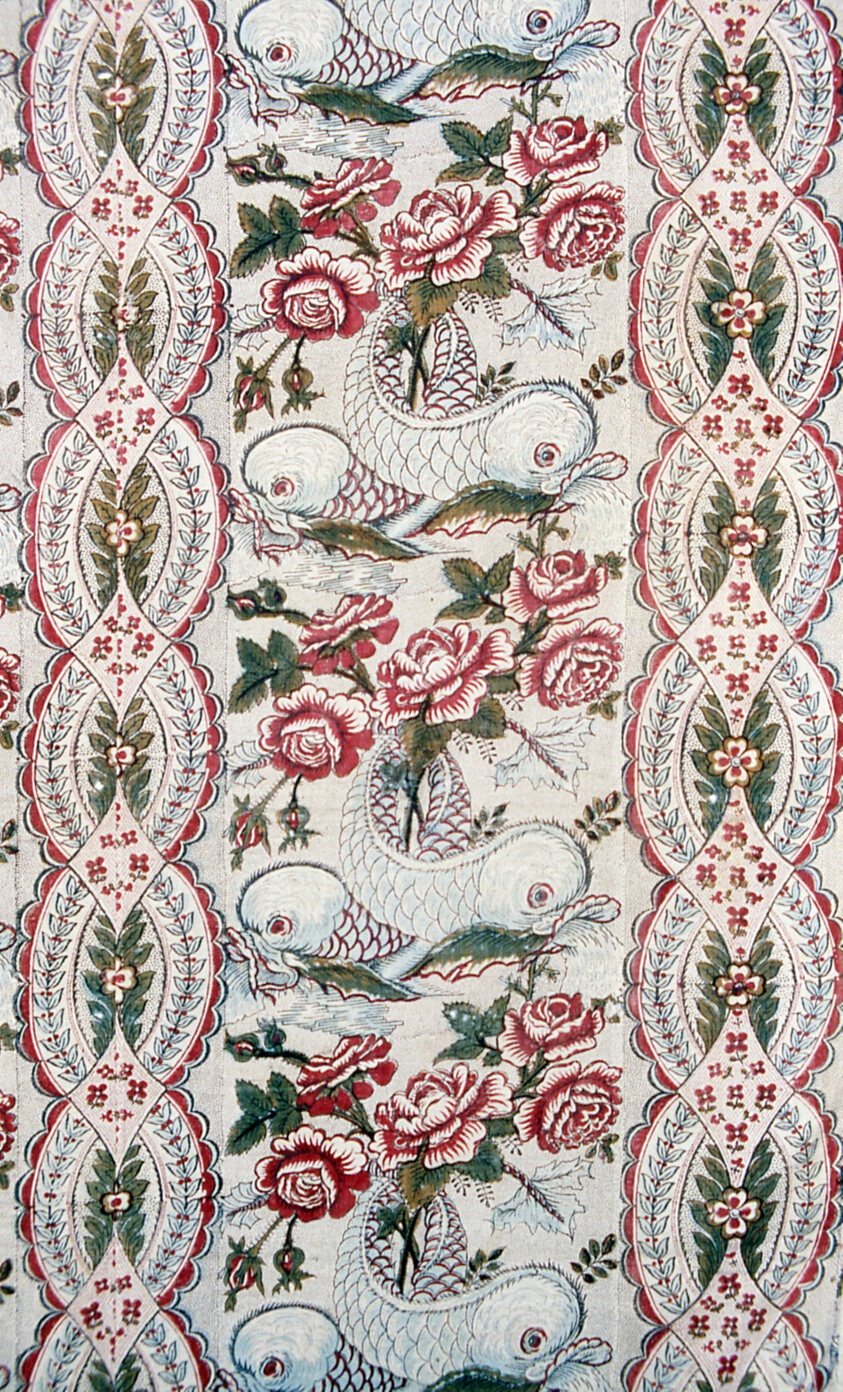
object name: Textile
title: Panel (Furnishing Fabric)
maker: France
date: 1770/82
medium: Linen and cotton, plain weave; block printed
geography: France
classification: textile; weaving - printed; furnishing textile